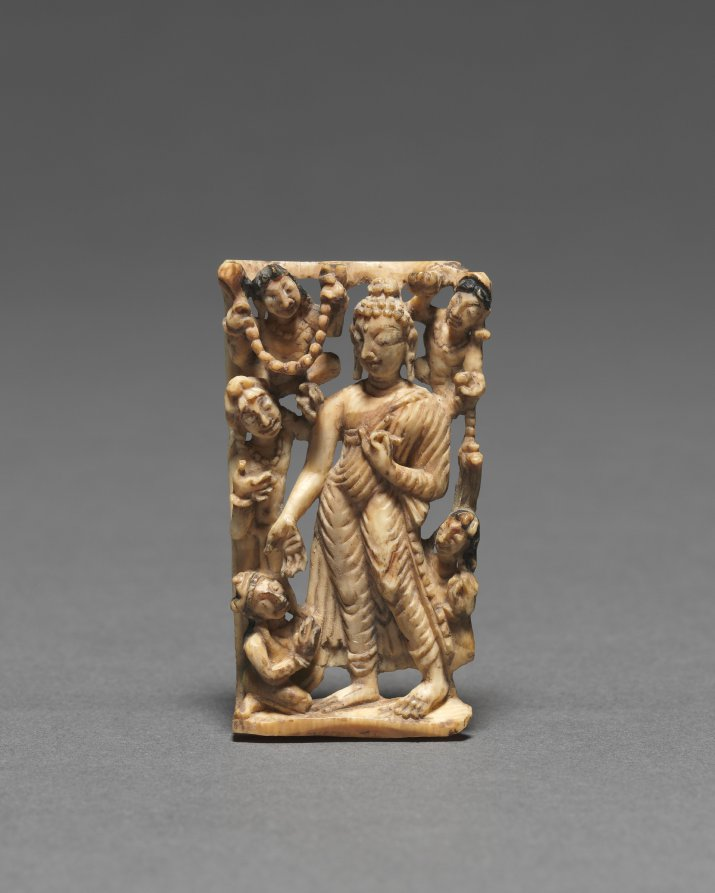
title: Walking Buddha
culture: India, Kashmir, 8th century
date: 700s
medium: ivory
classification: Ivory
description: Small, delicately carved ivory plaques were set into wooden shrines, carved with architectural motifs. This sculpted plaque would have once flanked a central seated Buddha, with a similar standing or walking Buddha on the opposite side. The pleated garment folds derived from Greco-Roman styles adopted in the ancient region of Gandhara, west of Kashmir, where this sculpture was made.